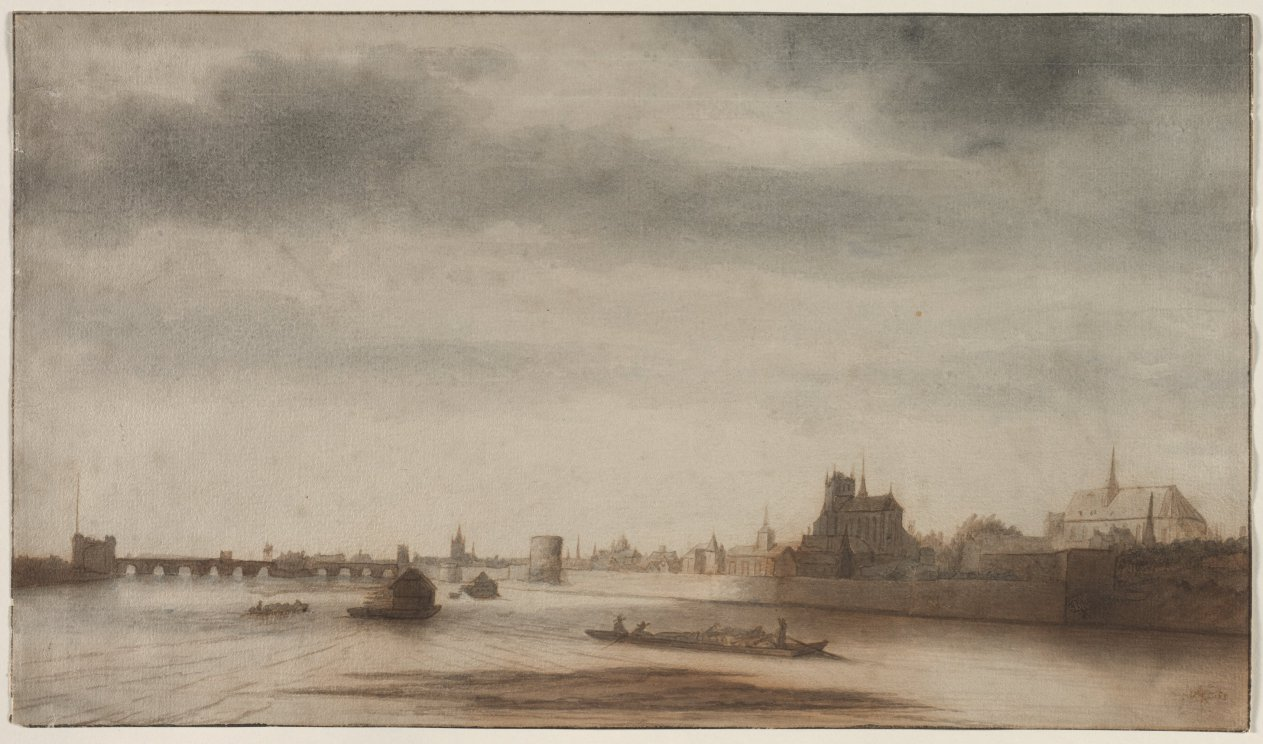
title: View of Orléans from the Loire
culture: Netherlands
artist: Lambert Doomer (Dutch, 1623–1700)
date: c. 1670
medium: pen and brown ink and brush and gray and brown wash; framing lines in brown ink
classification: Drawing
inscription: lower right, in red chalk(?): vG [16?]53 ; VERSO, lower left, in gray ink: De Stad Orlejens aan de rivier de Loore.